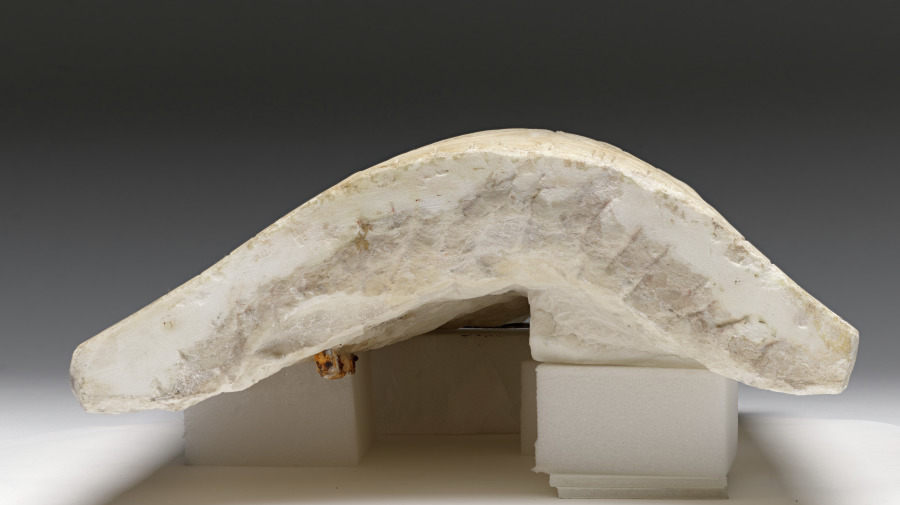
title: Aurelius Antoninus Pius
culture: Italy, Lombard School, late 15th century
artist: Gregorio di Lorenzo (Italian, c. 1436–1504)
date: late 1400s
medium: marble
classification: Sculpture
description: A laurel wreath rests on this Roman emperor’s finely articulated corkscrew curls, underscoring his military triumphs. While many ancient and classically inspired marble sculptures were painted, the survival of pigments is rare. In addition to the vibrant green coloring, traces of gold also remain on the leaves.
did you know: The artist can be identified by his distinctive flame-shaped curls forming the beard.